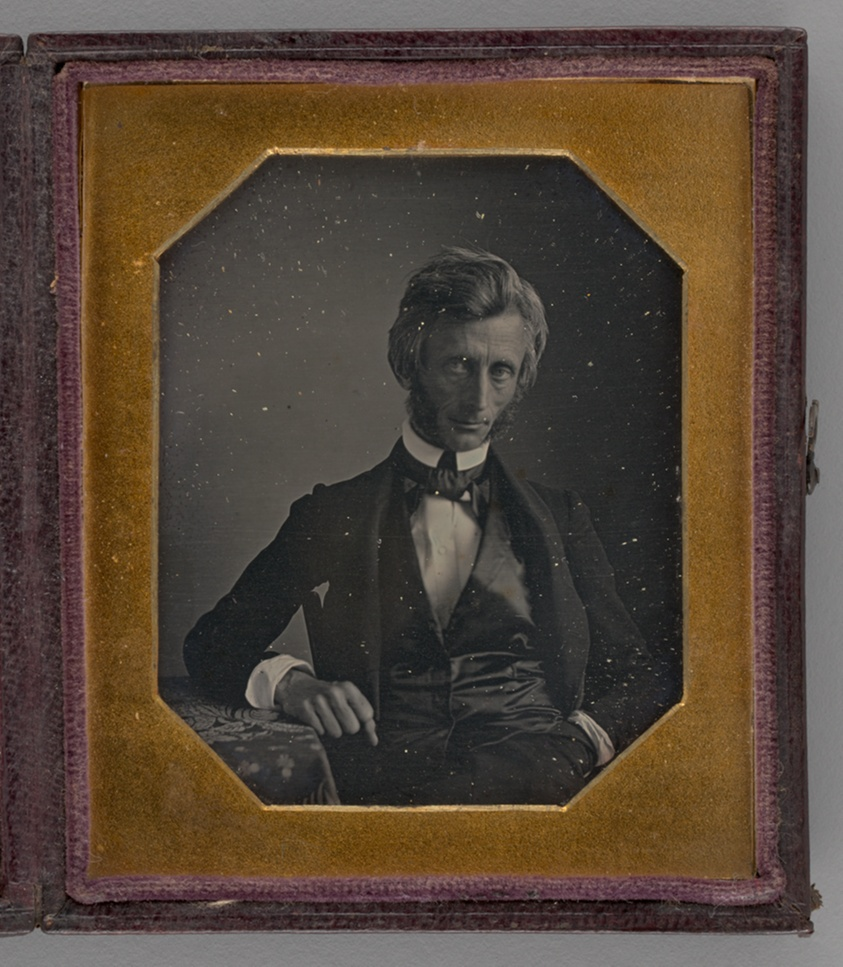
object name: Photograph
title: Untitled (Portrait of Man)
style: 19th century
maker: Mathew B. Brady; American, 1823–1896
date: 1846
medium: Daguerreotype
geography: United States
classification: portrait; photograph; photographic process; photography; portrait; daguerreotype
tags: lundberg collection, portraits, portraits: male subject, men, Male, portrait